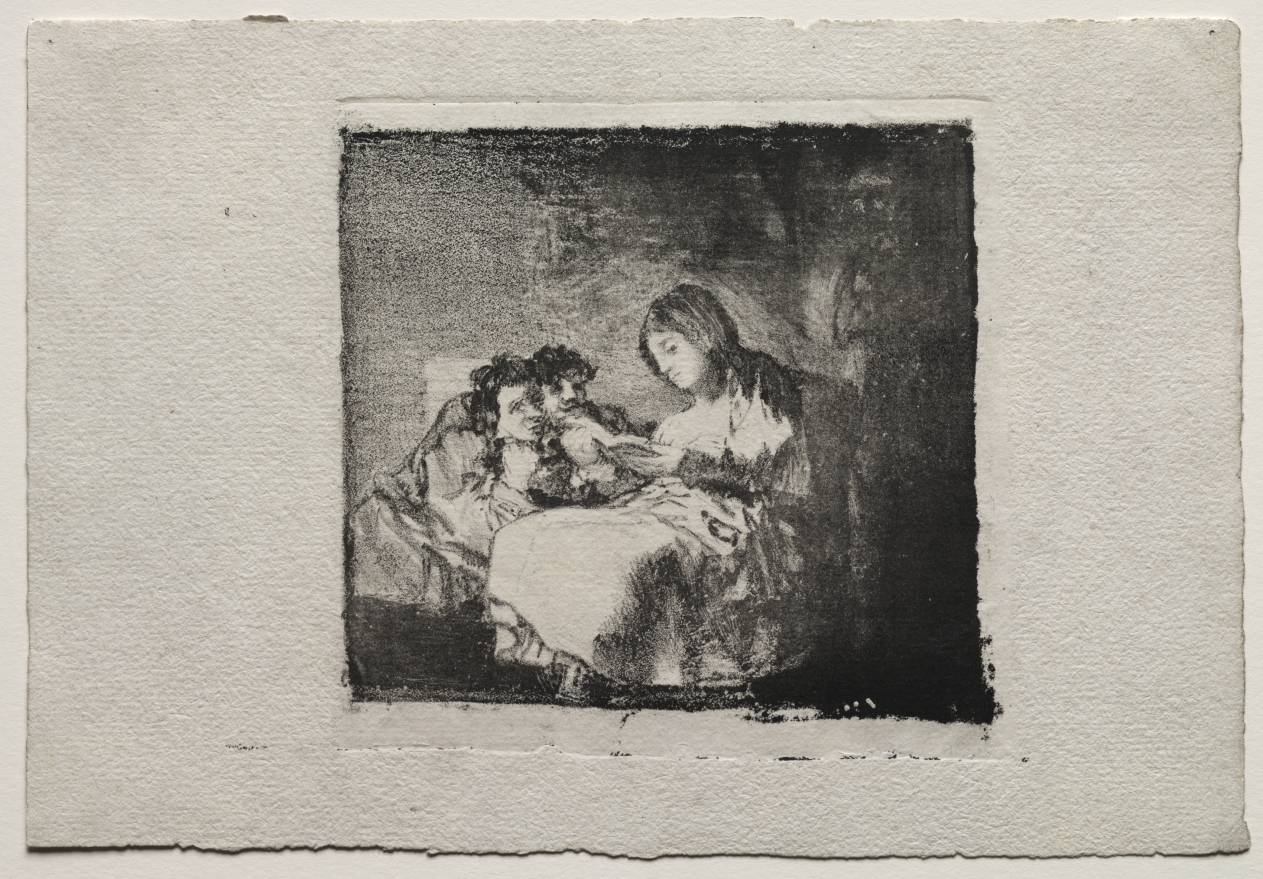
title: Woman Reading to Two Children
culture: Spain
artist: Francisco de Goya (Spanish, 1746–1828)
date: 1824–25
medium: lithograph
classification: Print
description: Goya left Spain in 1824 to escape the repressive rule of King Ferdinand VII and settled in Bordeaux, France, where he met Gaulon, an expert lithographer. Working with him, Goya executed Woman Reading to Two Children, where he drew densely with a crayon and then scratched out fine highlights on the woman's arm, skirt, mantilla, and around her head. An onlooker described Goya's methods, "Usually he covered the whole stone with a uniform gray tone and then removed with the scraper those parts which were to appear light. . . . Next the crayon was again employed to strengthen the shadows, the accents." Goya's portrayal of the children's rapt attention and the tranquil figure of the young woman suggests that this charming domestic scene was observed by the artist in his own home. Goya was joined in Bordeaux by his companion Leocadia Weiss and her two younger children, Guillermo and María del Rosario. Only seven impressions of this lithograph are known, all of which are now in museum collections.